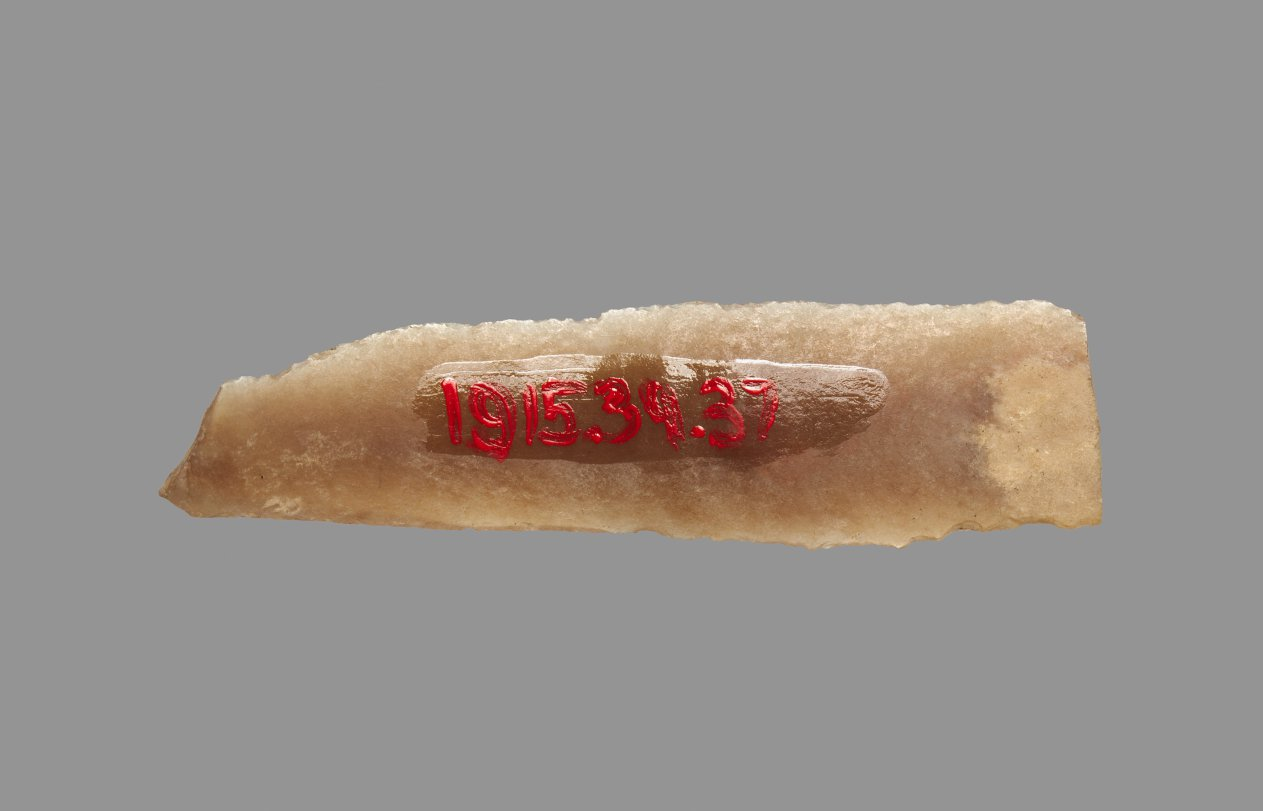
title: Sickle Blade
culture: Egypt, Middle Kingdom (2040–1648 BCE), Dynasty 12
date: 1980–1801 BCE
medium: flint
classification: Implements